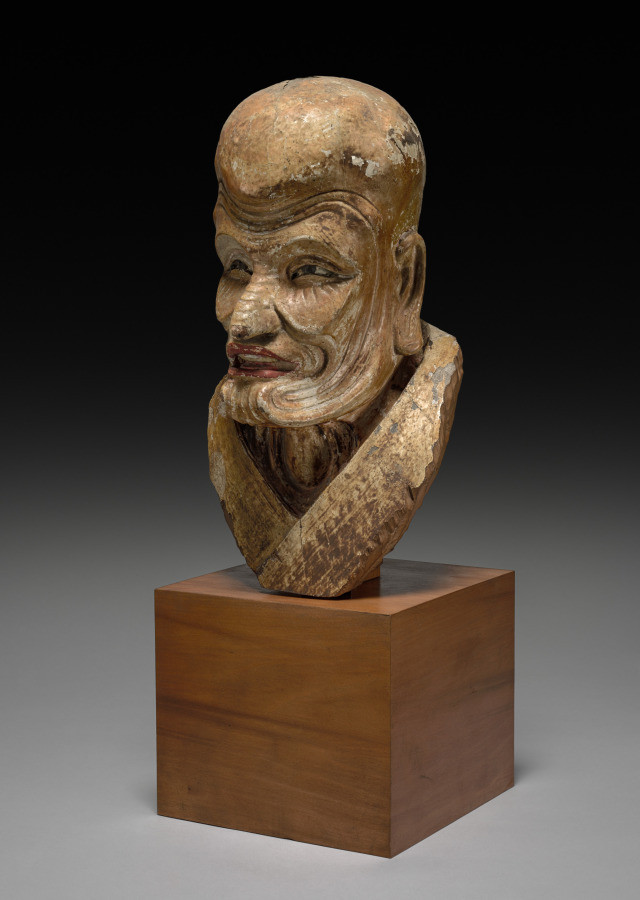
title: Head of a Patriarch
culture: China, Ming dynasty (1368-1644) or earlier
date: 1368–1644 or earlier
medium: wood covered with lacquer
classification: Sculpture